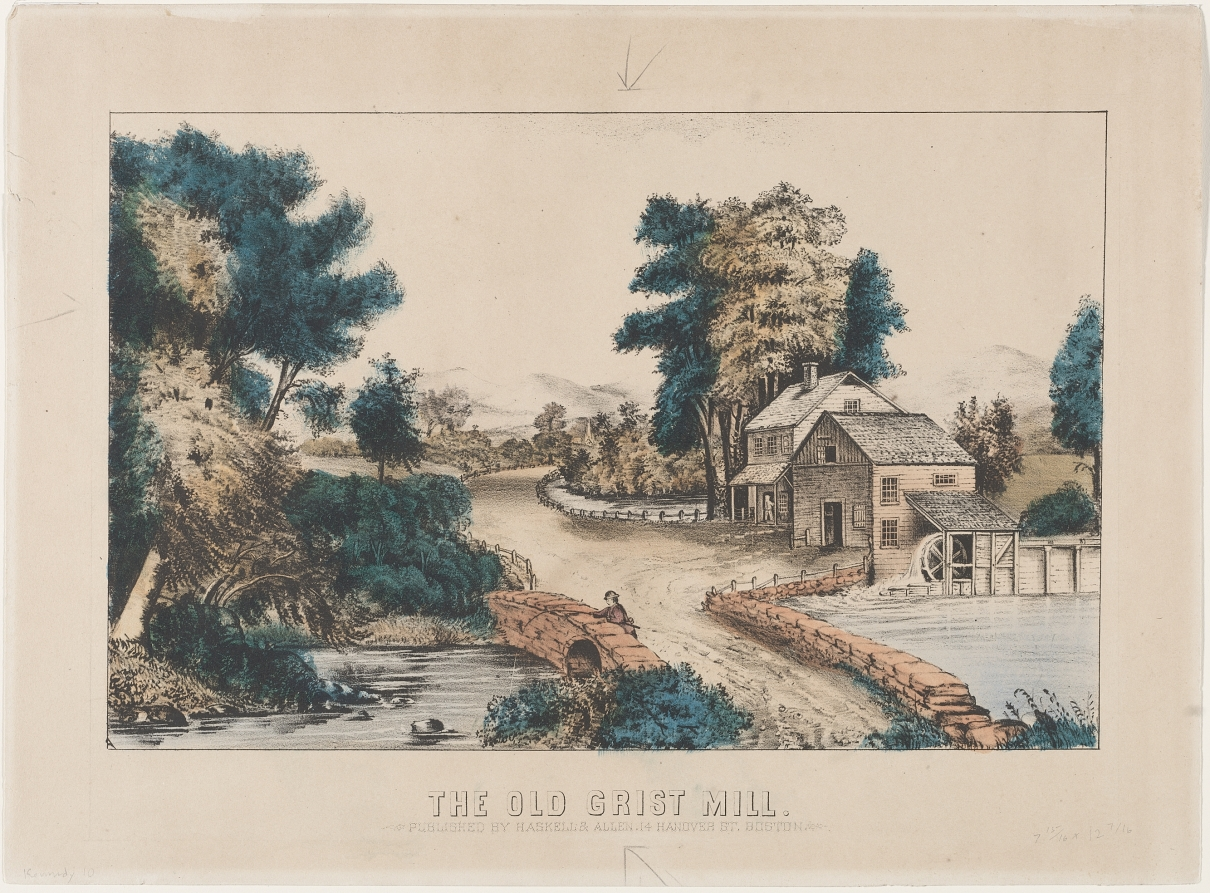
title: The Old Grist Mill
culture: America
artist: Anonymous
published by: Haskell & Allen (American)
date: 19th century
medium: lithograph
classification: Print